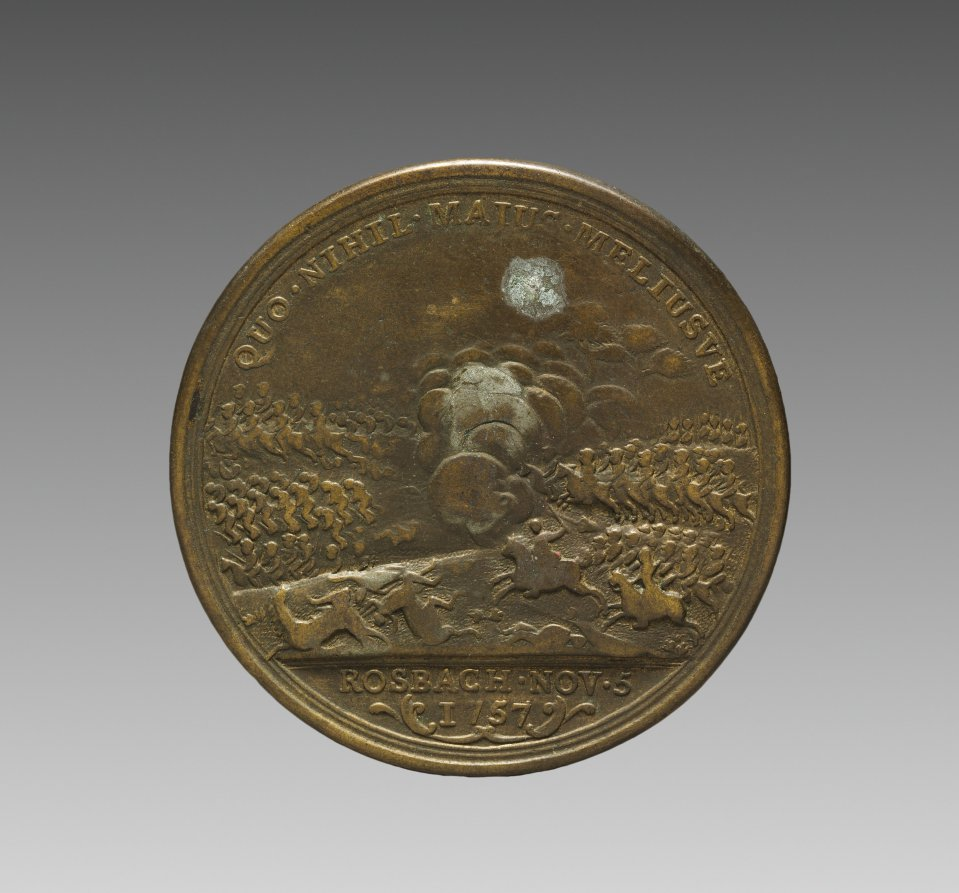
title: Portrait of Frederick the Great, King of Prussia (reverse)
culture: Germany, 18th century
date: 1757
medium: bronze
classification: Sculpture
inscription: "QUO NIHIL MAJUS MELUISVE. ROSBACH. NOV. 5, 1757."